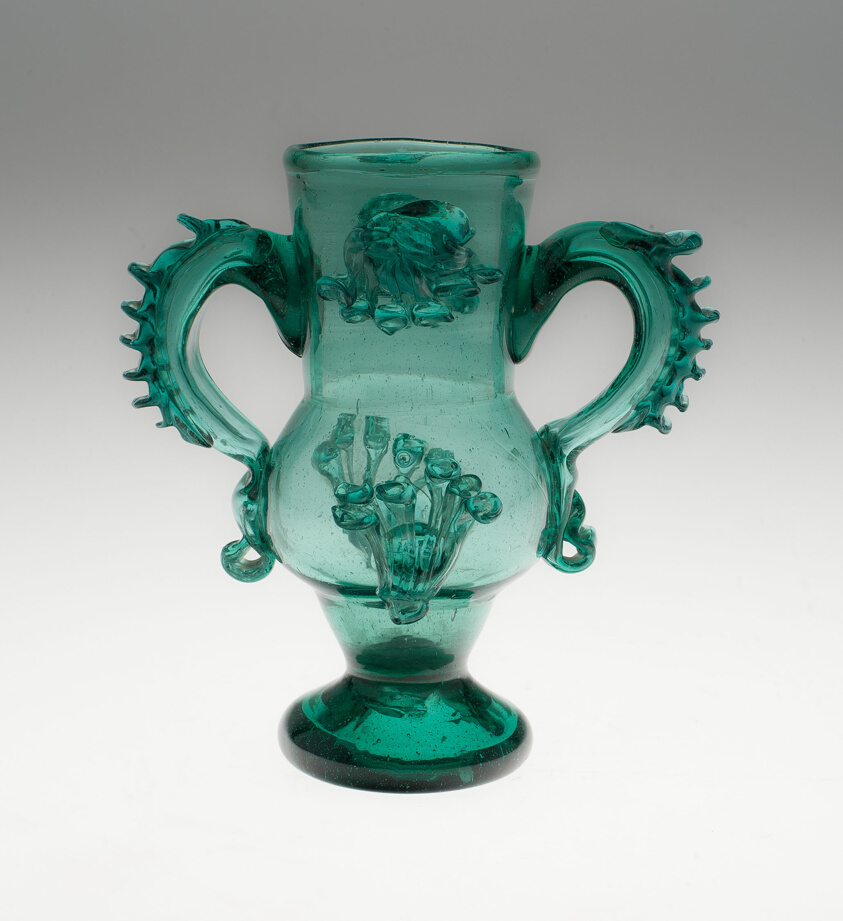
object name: Glass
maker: Spain, Andalusia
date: 16th century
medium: Glass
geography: Spain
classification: vase; vessel; glass; european decorative arts